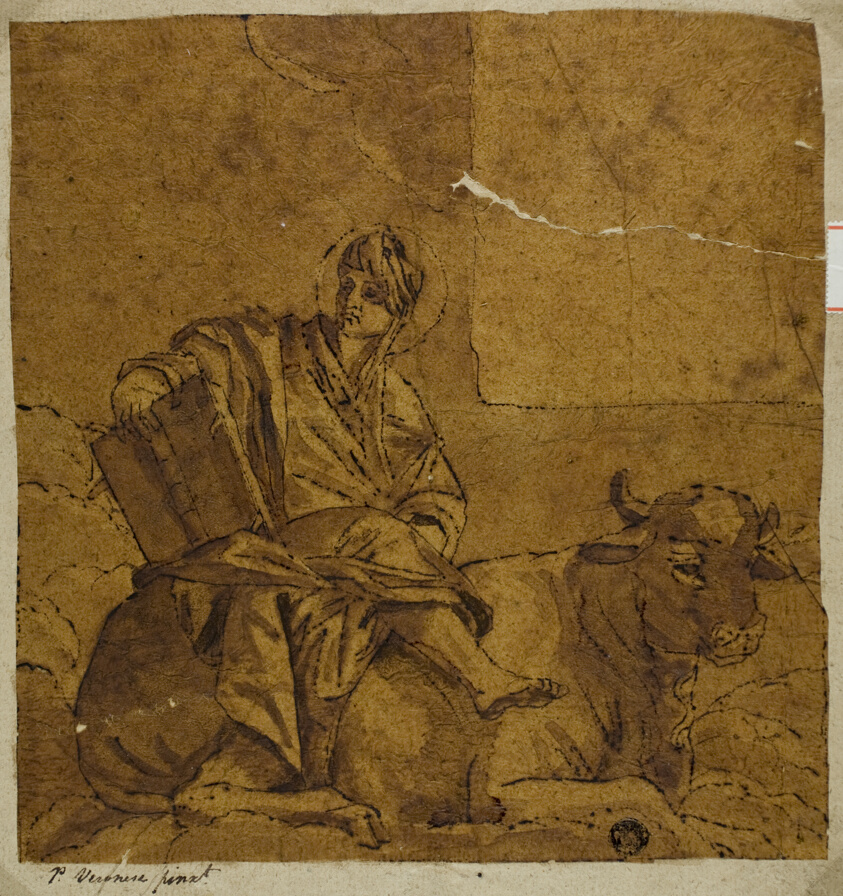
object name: Drawing and Watercolor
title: Saint Luke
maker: After Paolo Caliari, called Paolo Veronese; Italian, 1528-1588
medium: Pen and black ink, with brush and brown wash, on an oiled golden-yellow transparentized wove paper, laid down on tan laid paper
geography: Italy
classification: ink with wash; drawings (visual works); prints and drawing